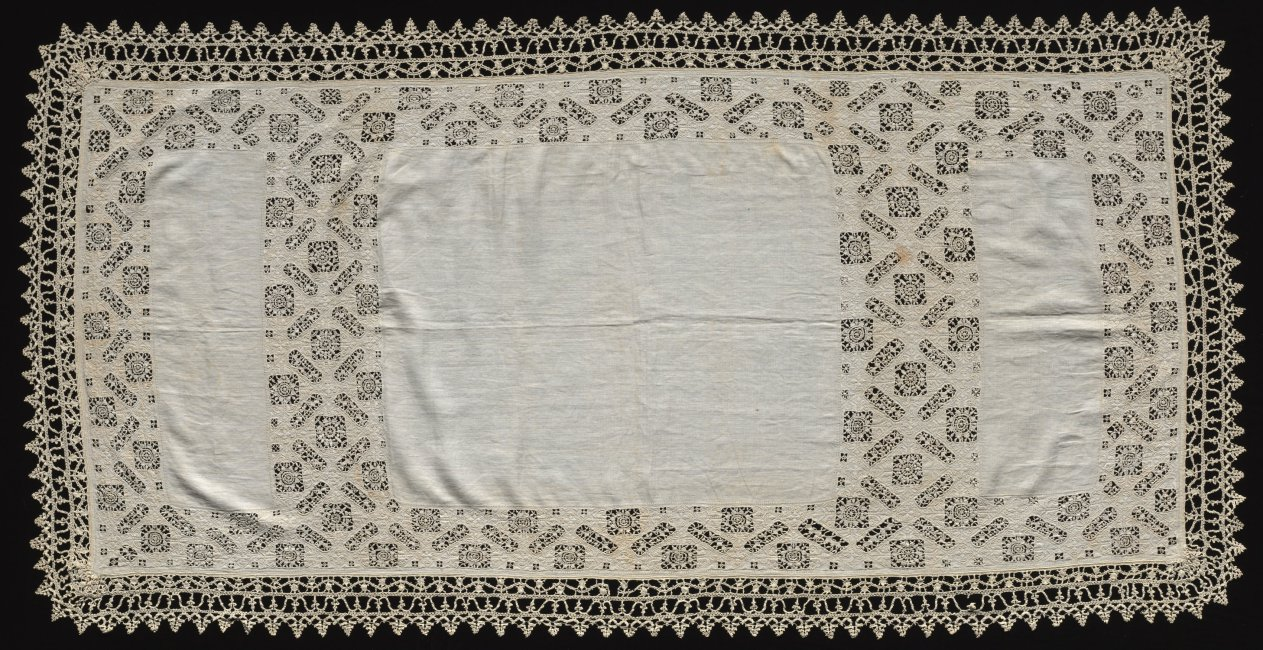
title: Lace Cloth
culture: Italy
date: 1500s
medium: Linen: needle lace (cutwork) and bobbin lace edging and embroidery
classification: Lace